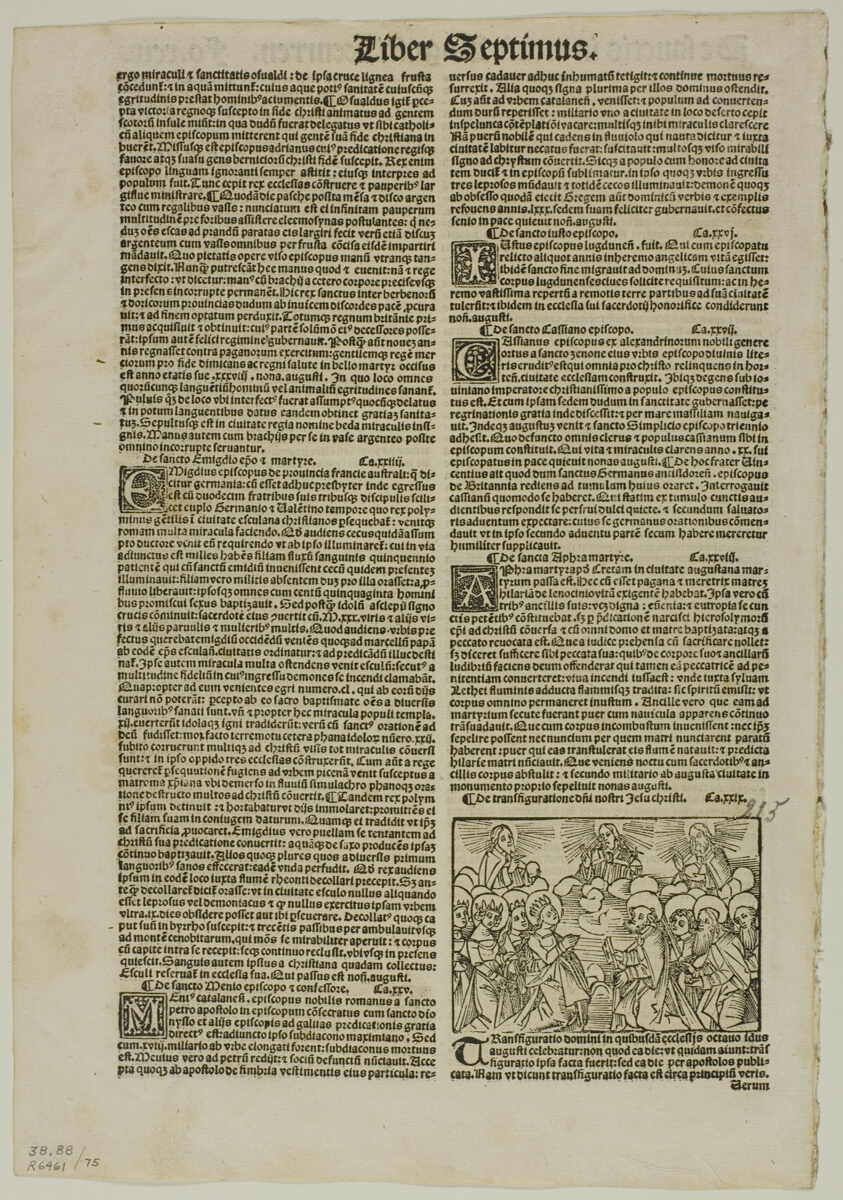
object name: Print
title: Leaf from Catalogus Sanctorum by Petrus Natalibus, plate 75 from Woodcuts from Books of the XVI Century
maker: Unknown Artist (French, 16th century); assembled by Max Geisberg (Swiss, 1875-1943)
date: 1542, assembled into portfolio 1937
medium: Woodcut on paper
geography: France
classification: woodcut; print; prints and drawing